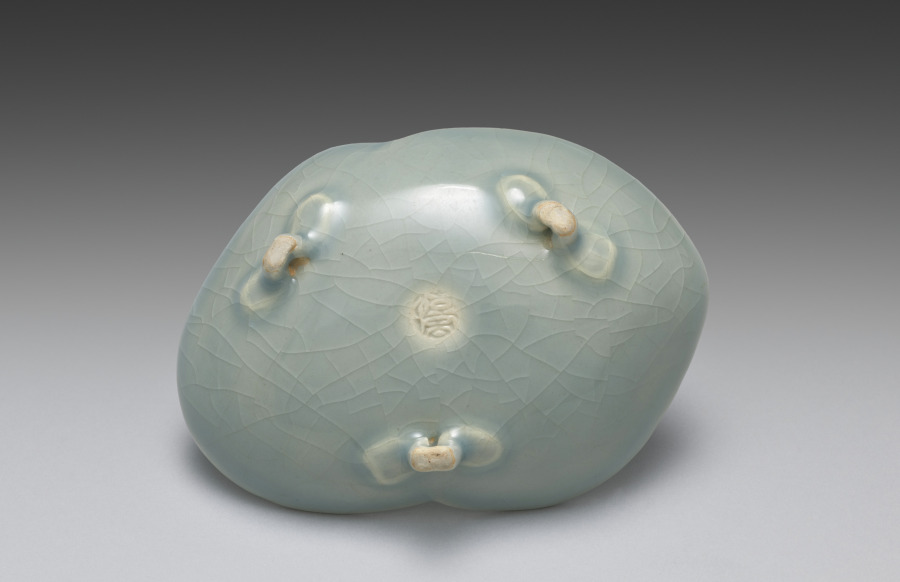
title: Dish from Saucers with Matching Shells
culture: Japan, Meiji period (1868–1912)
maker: Seifū Yohei III (Japanese, 1851–1914)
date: 1893–1914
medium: Porcelain with molded design and green crackled glaze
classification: Ceramic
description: Yohei III’s main output for his sophisticated clientele was in the form of tea sets and dining sets. He created a range of dishes in green glazes. He often produced in pairs, sets of five, or sets of ten. The set of five dishes with a more complex form is described as having a “water-colored glaze” (mizuiroyū). These are shaped like clam half shells, a reference to a game in which shell halves painted with narrative scenes or a variety of motifs must be matched back together by the players. The dishes have molded details to articulate the shell forms, and the crackling across each shell adds another dimension to the surface. Each dish is set on three small feet, formed by a pinched piece of clay and attached to an unglazed area on the underside of the dish. Curiously, while four of the dishes are stamped with the artist’s mark, one has instead a signature carved into the base.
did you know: The saucers are meant to look like matched halves of clam shells in reference to a once popular game.